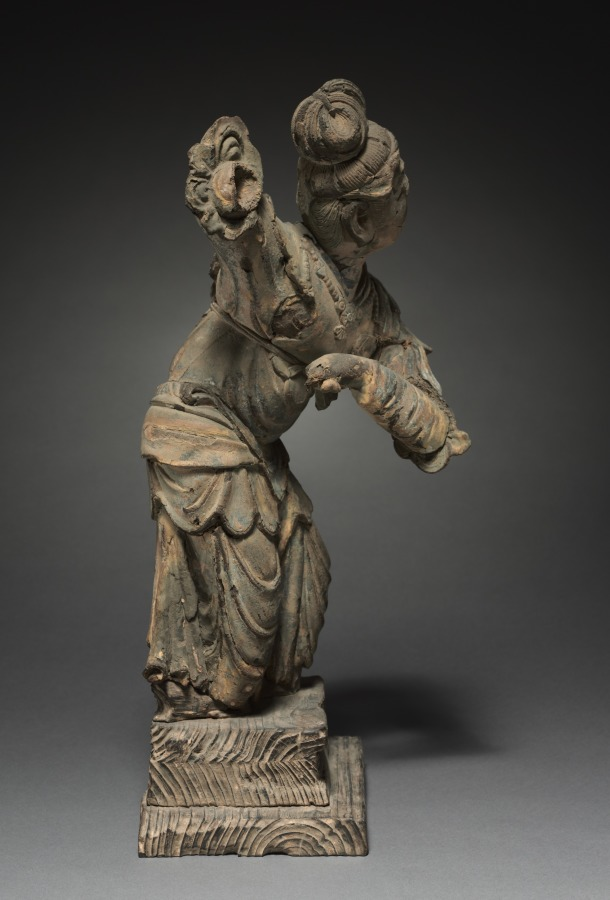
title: Dancing Apsaras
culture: China, late Tang dynasty (618–907) to Five dynasties (907–960)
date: 900s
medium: dry lacquer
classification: Sculpture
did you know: The sculpture was made from a rare technique involving alternate layers of cloth and lacquer, modeled on an armature or around a removable clay core.